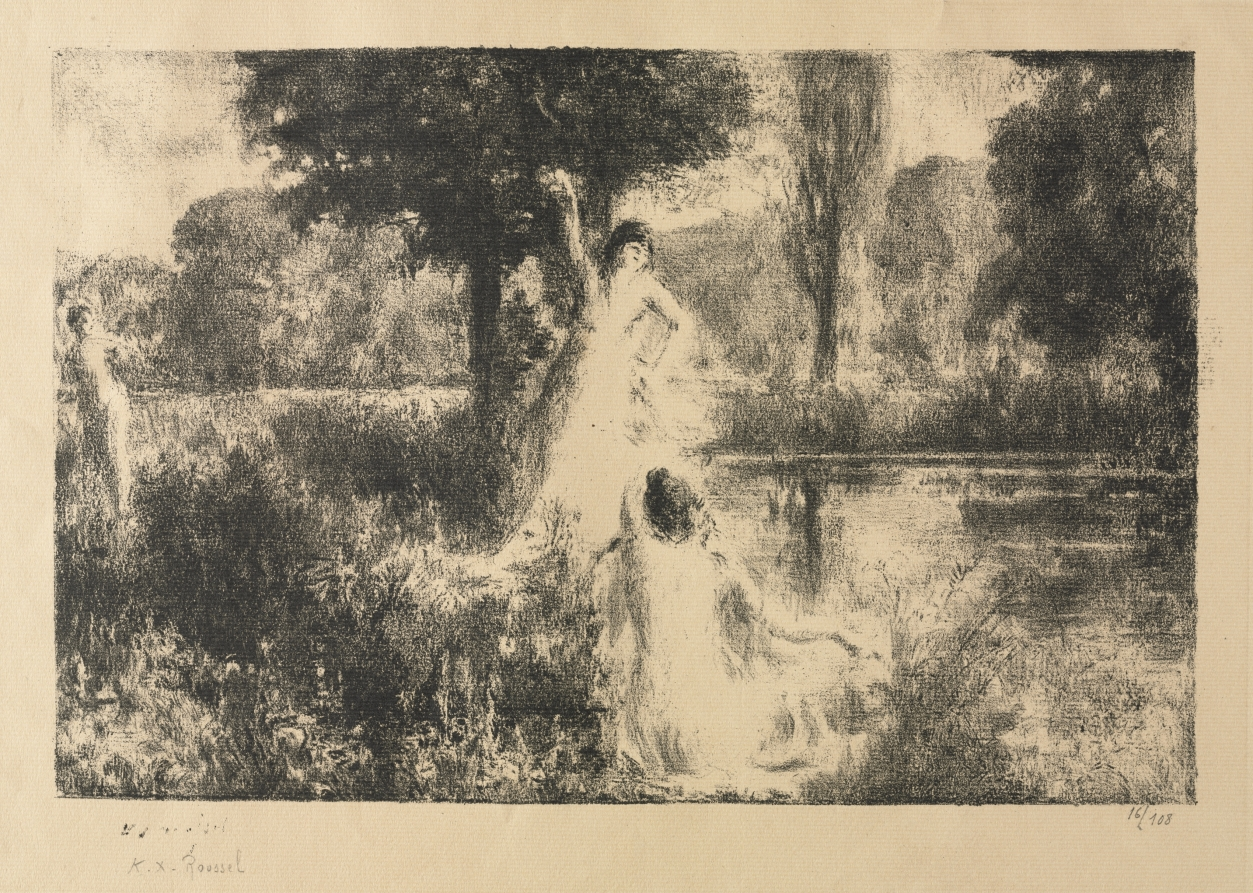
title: Two Nymphs Beside a Pond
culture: France, 20th century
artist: Ker Xavier Roussel (French, 1867–1944)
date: c. 1920–40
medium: lithograph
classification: Print